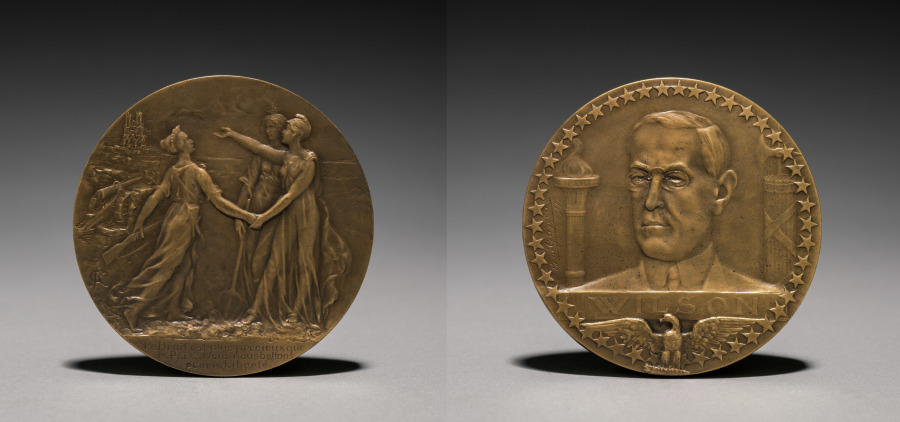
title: Medal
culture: France, early 20th century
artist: René Grégoire (French, 1871–1945)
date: 1914–1918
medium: bronze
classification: Metalwork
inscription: observse - "Wilson." reverse - "Le droit est plus précieux que la paix . . . Nous, nous battons pour la liberté."